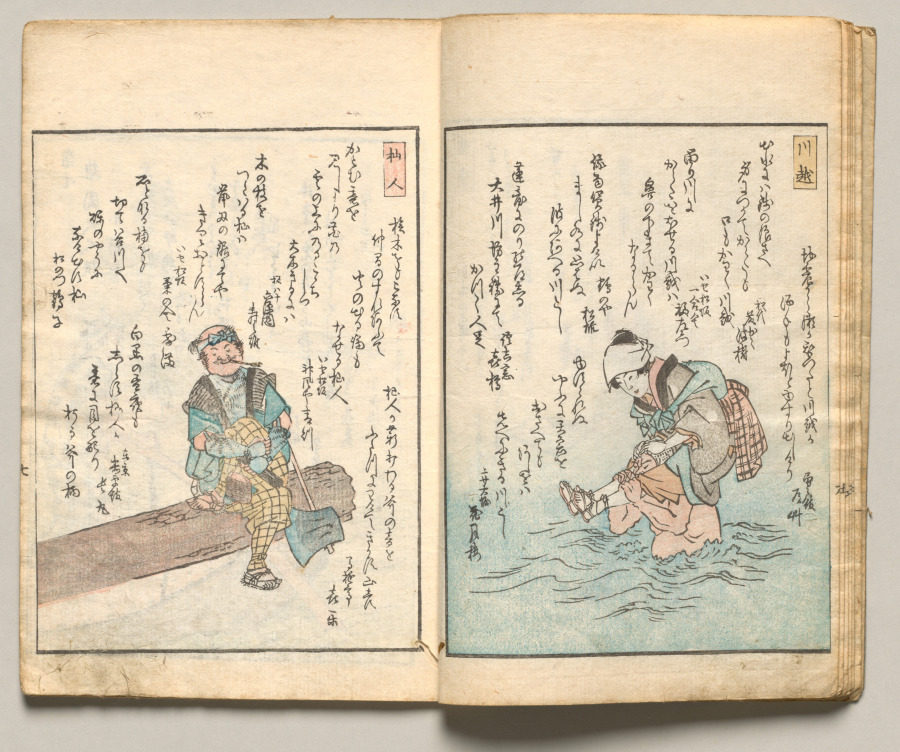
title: Spread Seven from Volume Seven of People of Japan in Light Verse (Kyōka)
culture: Japan, Edo period (1615–1868)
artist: Utagawa Hiroshige (Japanese, 1797–1858)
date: 1857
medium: Woodblock-printed book; ink and color on paper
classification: Bound Volume